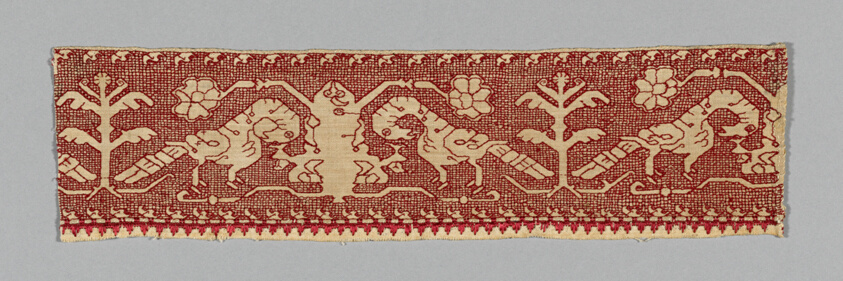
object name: Textile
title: Fragment from a Border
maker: Italy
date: 17th century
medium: Linen, plain weave; embroidered with silk floss in double running and back stitches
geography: Italy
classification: textile; weaving; needlework (visual works)